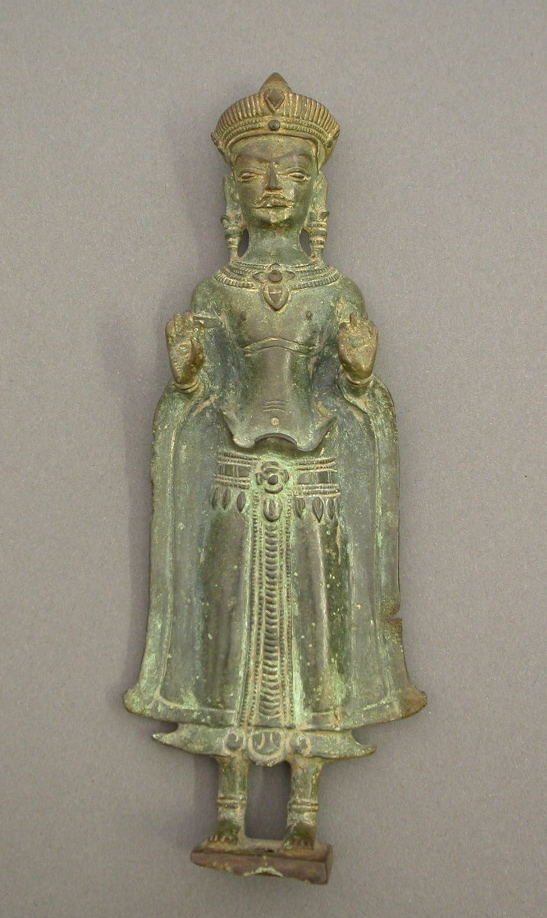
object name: Sculpture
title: Crowned Buddha with Hands in Gesture of Teaching <em>(Vitarkamudra)</em>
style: Southeast Asian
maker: Thailand or Cambodia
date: Angkor period, 12th century or later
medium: Bronze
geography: Thailand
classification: bronze; asian art; sculpture